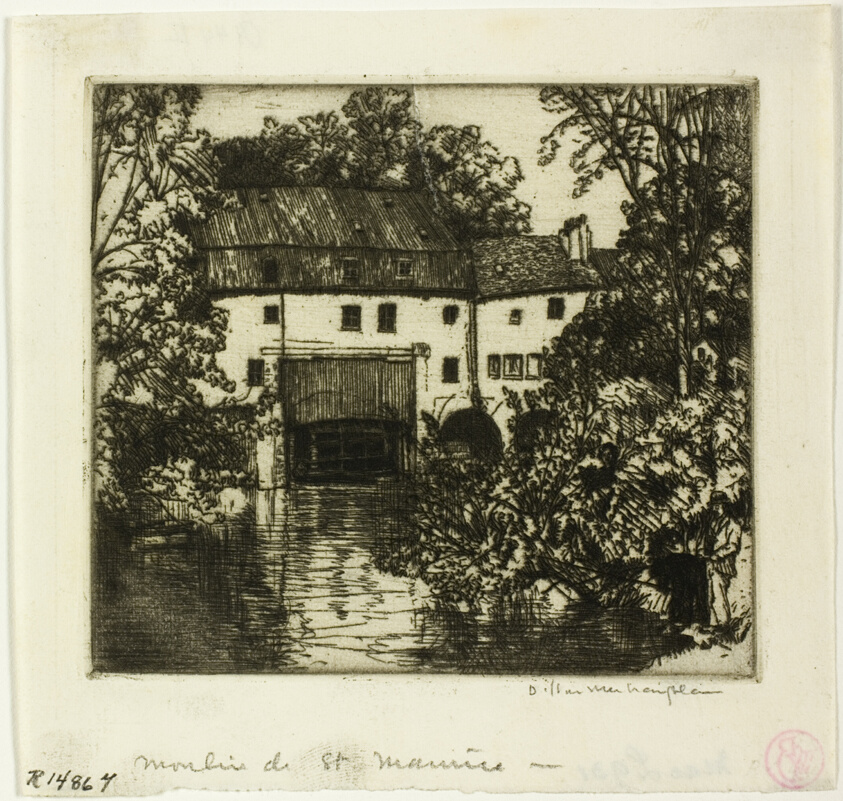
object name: Print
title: Moulin St. Maurice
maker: Donald Shaw MacLaughlan (American, born Canada, 1876-1938)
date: 1902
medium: Etching in black on cream wove paper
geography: United States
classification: etching; print; prints and drawing